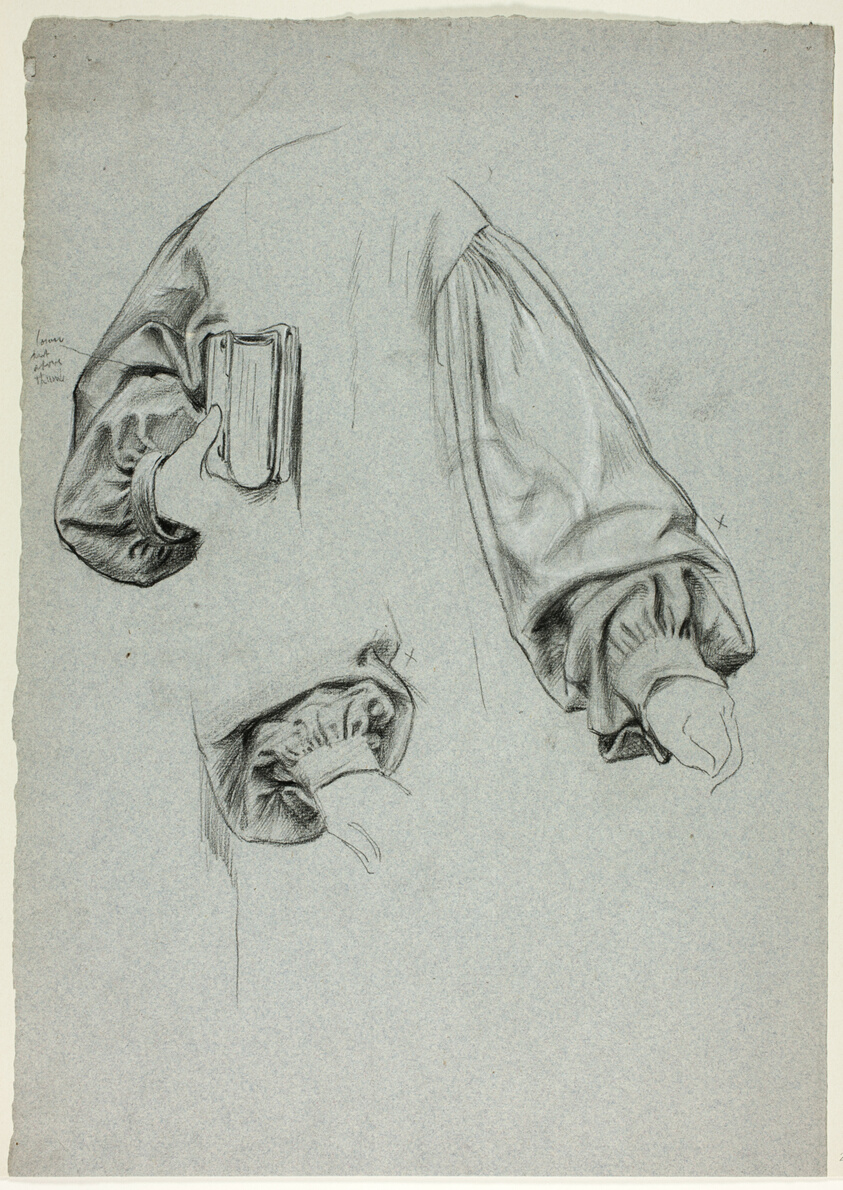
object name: Drawing and Watercolor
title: Three Sketches of Sleeves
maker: Henry Stacy Marks (English, 1829-1898)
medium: Black pastel, heightened with touches of white pastel, on blue laid paper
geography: England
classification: pastel; drawings (visual works); prints and drawing